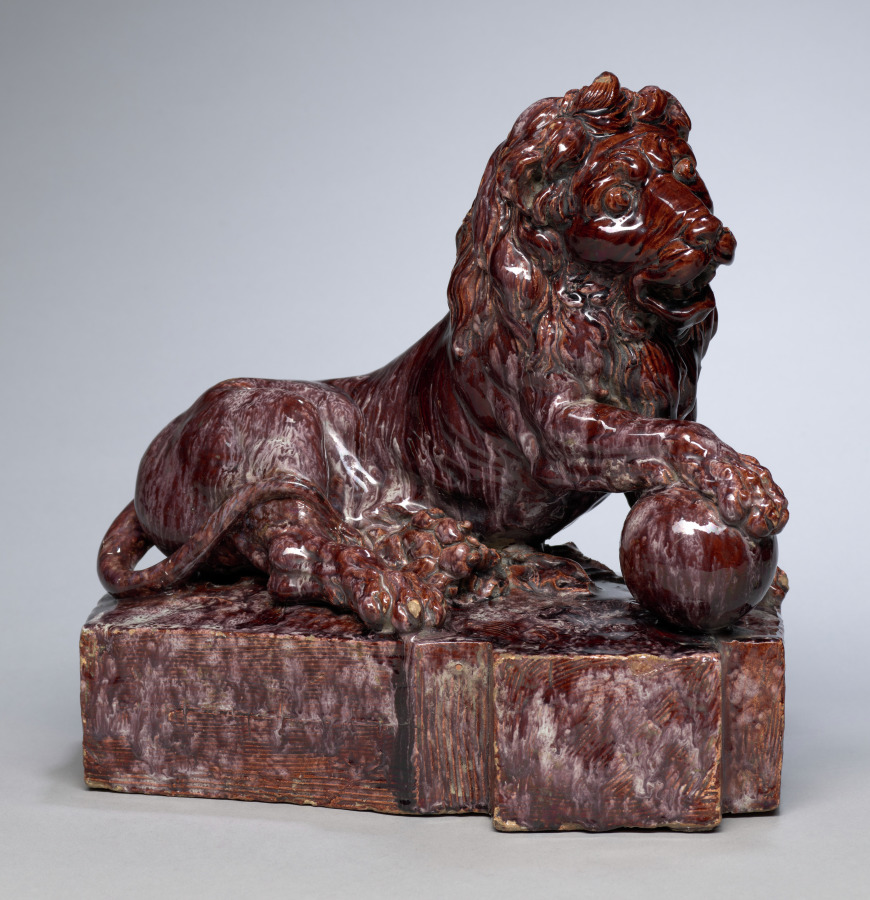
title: Lion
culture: France, 20th century (?)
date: 1900s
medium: terracotta glazed in mottled purple tin glaze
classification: Ceramic